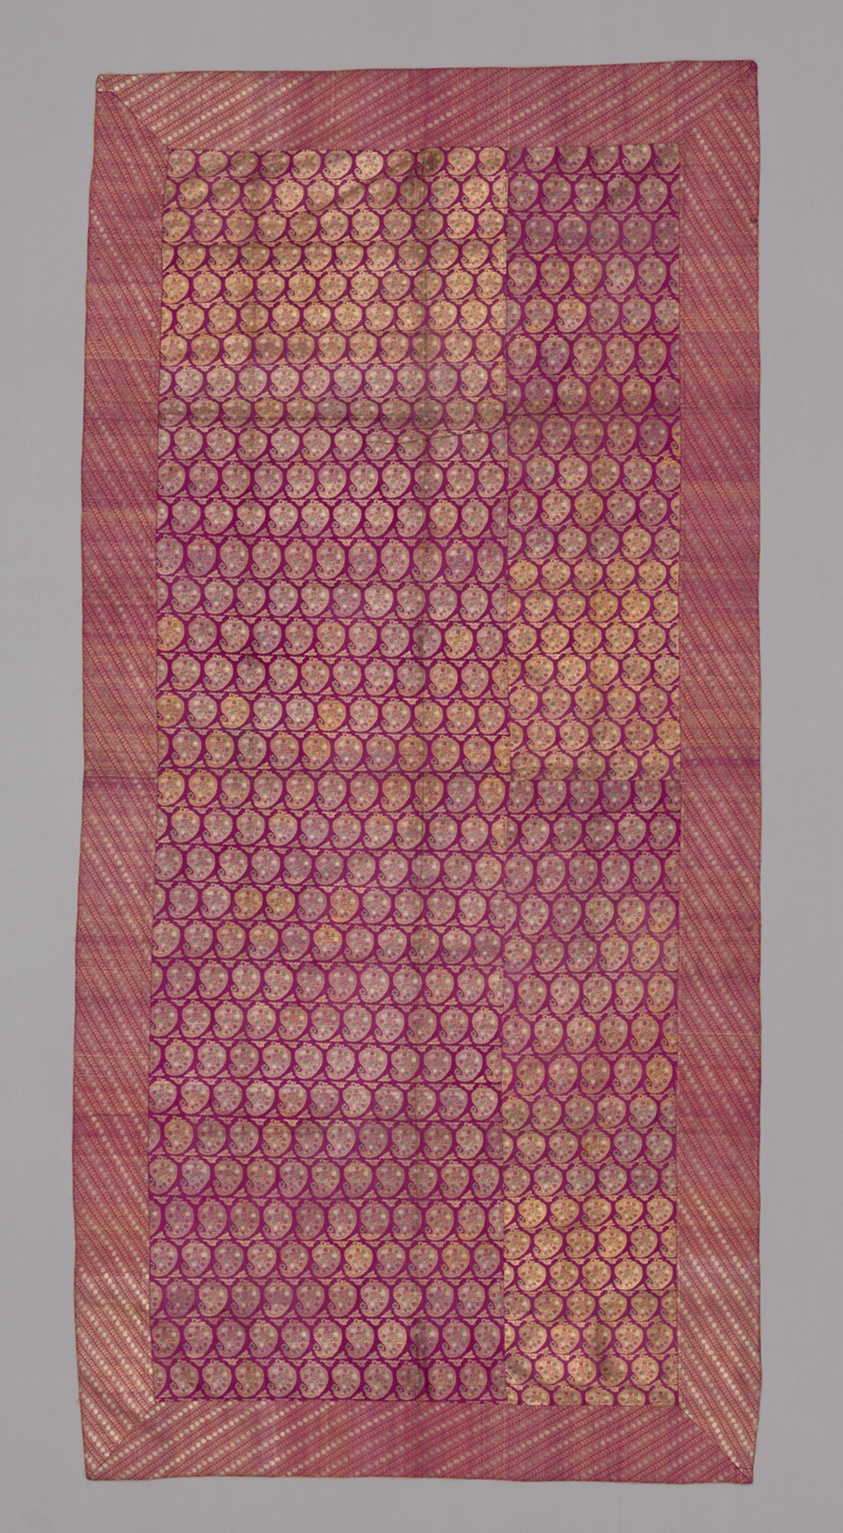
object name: Costume and Accessories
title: Sari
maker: India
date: Late 19th century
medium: Red silk and gold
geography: India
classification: textile; weaving; costume; sari (garment)